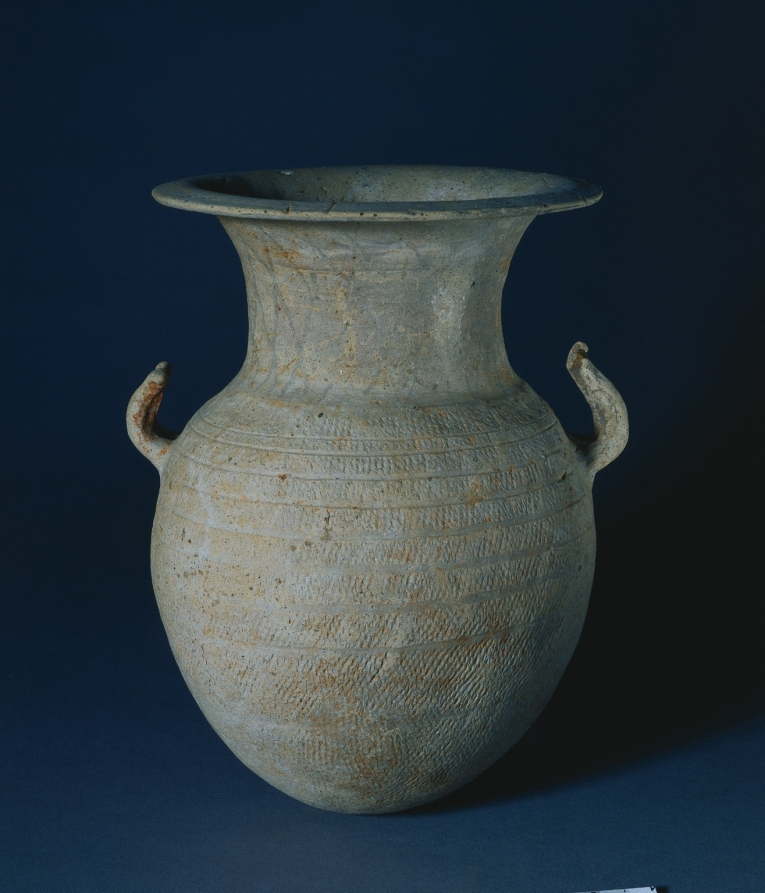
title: Jar with Horn-Shaped Handles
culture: Korea, Silla (57 BCE–935 CE)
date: 200s–400s CE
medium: earthenware with incised decoration and color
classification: Ceramic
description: Pottery vessels, such as this one, were produced in sloping tunnel kilns that reached 1,000 to 1,200 degrees Celsius. This jar’s bulbous body with delicate horn-shaped handles suggests that it may have served to present offerings to the deceased. This type of high-fired terracotta vessel is usually excavated from tomb sites in the southwestern region of the Korean peninsula.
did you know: Closed kilns built on hillsides became widely used for producing this type of pottery vessel in Korea during the Three Kingdoms period.